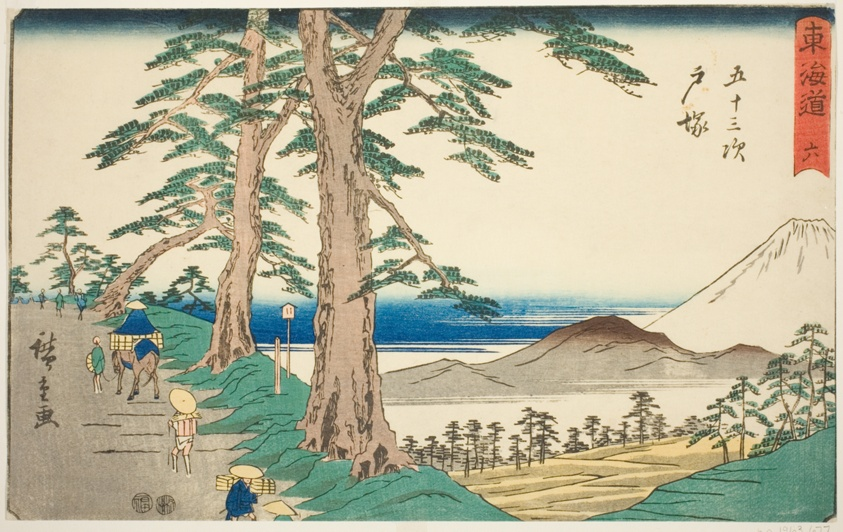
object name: Print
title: Totsuka—No. 6, from the series "Fifty-three Stations of the Tokaido (Tokaido gojusan tsugi)," also known as the Reisho Tokaido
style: Japanese (culture or style)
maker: Utagawa Hiroshige 歌川 広重; Japanese, 1797-1858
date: c. 1847/52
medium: Color woodblock print; oban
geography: Japan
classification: woodblock print; print; asian art